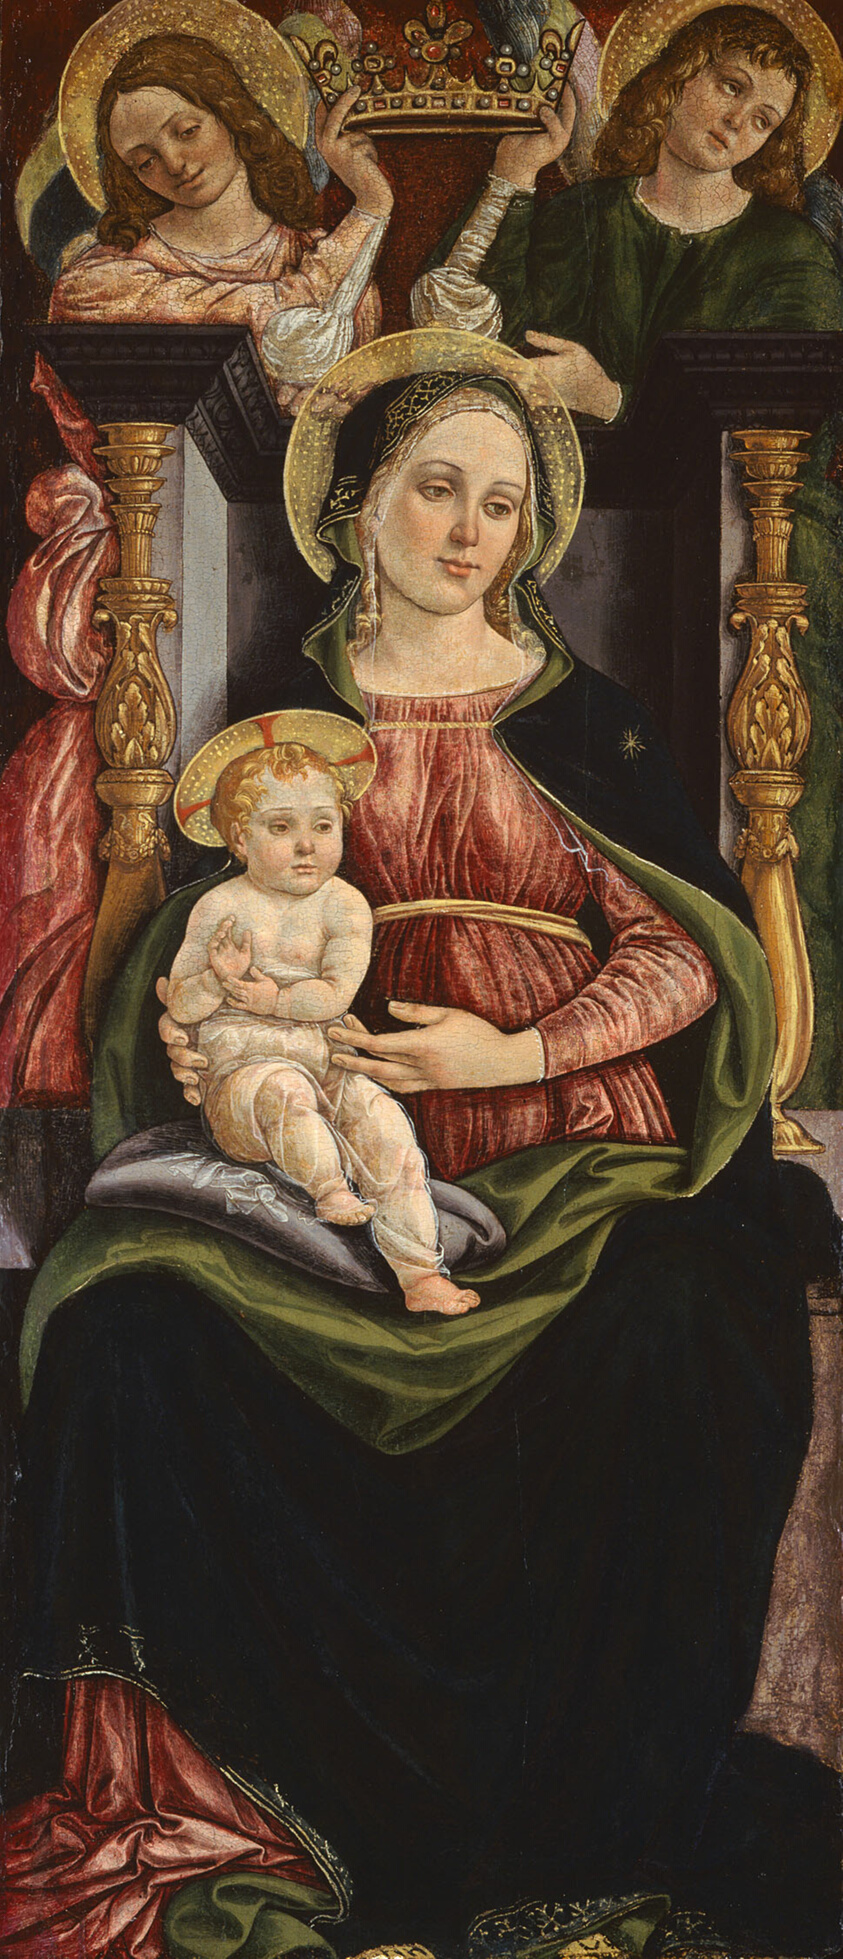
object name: Painting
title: Virgin and Child Enthroned with Two Angels Holding a Crown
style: 16th Century, Renaissance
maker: Attributed to Ansano Ciampanti (Italian, active 16th century)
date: c. 1510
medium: Tempera on panel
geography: Italy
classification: tempera; paint; Italian; painting; european painting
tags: Virgin and child/Madonna and child, angels, children, Jesus, Throne, Virgin Mary, woman, woman with children, Devotion, Christianity, Christian subjects, religious, religion